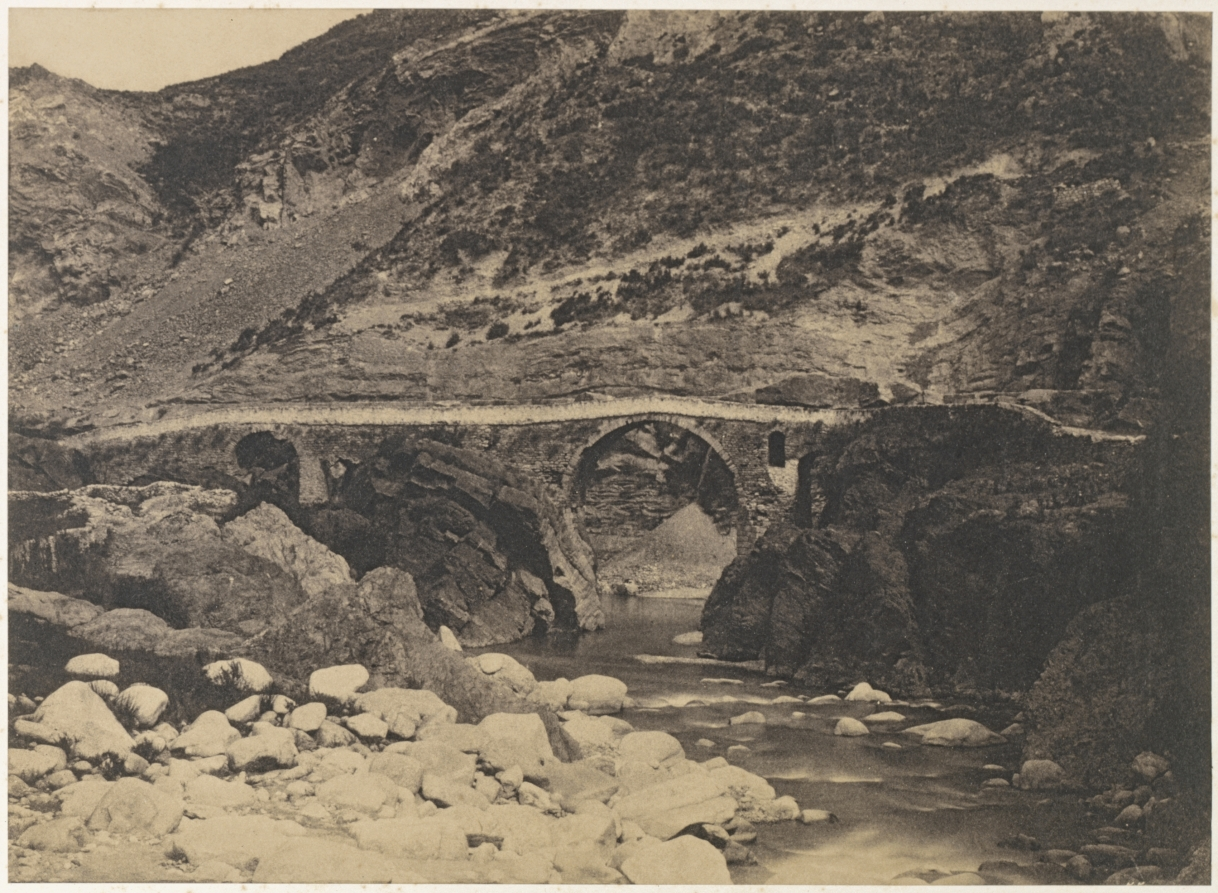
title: The Bridge of Palalda (near Amelieles-Bains)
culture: France, 19th century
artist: Gustave Le Gray (French, 1820–1884)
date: 1851–1852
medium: salted paper print from waxed paper negative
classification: Photograph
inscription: Written in pencil on recto of mount: "Gustave LeGray c. 1851"; in pencil on verso: "Le Gray"; "g [in center of a triangle - monogram ?]"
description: In 1851, Gustave Le Gray and his friend, photographer Auguste Mestral, traveled throughout southwestern France for the Commission of Historic French Monuments to document sites of historical importance, especially those in urgent need of, or undergoing, restoration. This image was taken from the left bank of the Tech River, situated below the old town of Palalda, four miles from the Spanish border. Le Gray stressed the rugged landscape over a close-up rendering of the ancient bridge, which was not on his list of assigned sites. The sheer cliff seems to blend into the structure, resulting in visual uncertainty and spatial tension.